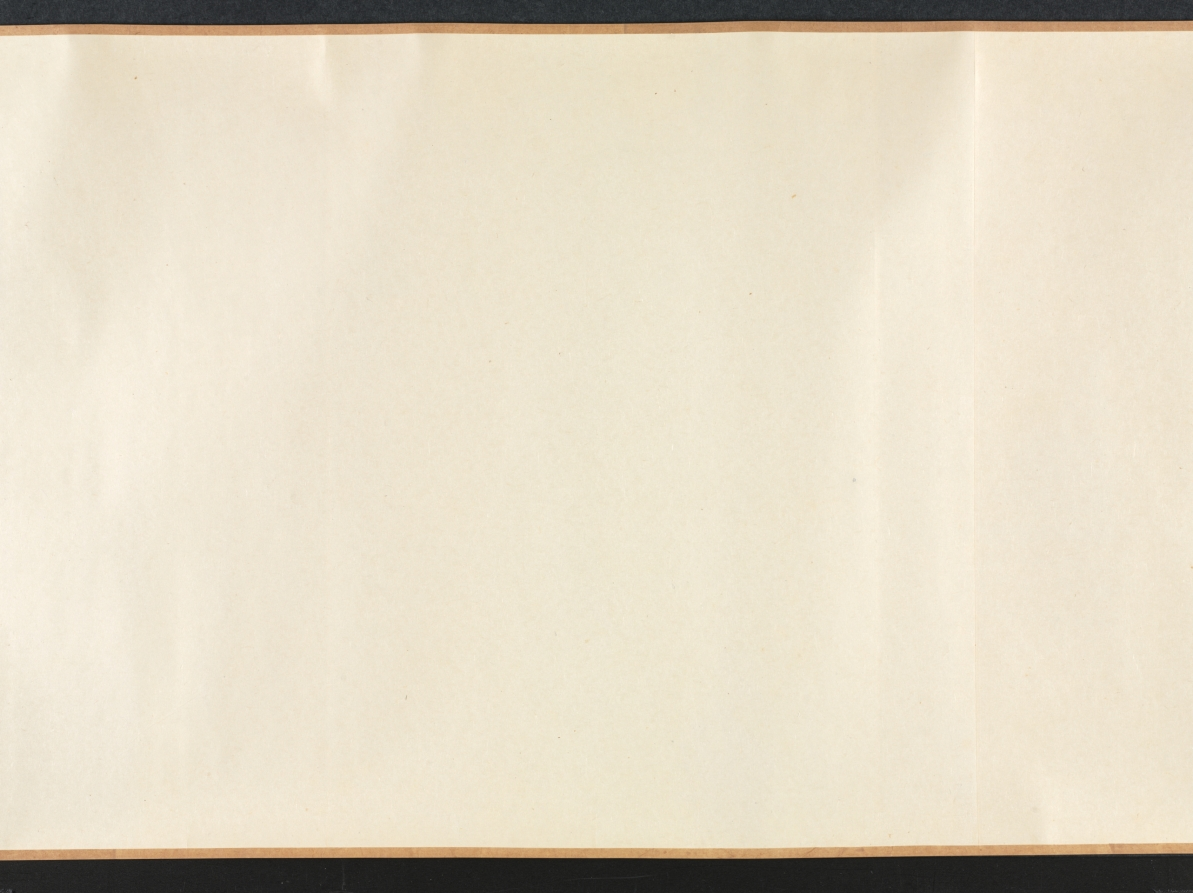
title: Hall of Lofty Pines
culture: China, Qing dynasty (1644-1911)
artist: Wang Hui (Chinese, 1632–1717)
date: 1703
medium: handscroll; ink and color on paper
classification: Painting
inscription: [題] 松喬堂圖 康熙癸未夏六月, 海虞耕煙散人王翬畫。[印]王翬之印; 石谷. [左下] 來青閣; 耕煙野老時年七十有二.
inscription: 松喬堂圖一卷，海虞石谷王君為靜海近公厲少司冦公作也。圖成于癸未之夏。未幾而公遂仙去。公令子今編修君南湖屬余題跋其後。余與公同官侍從，交契最深。側見公之清修純德，蔚為聖天子所眷重。侍直內廷，密勿贊襄，幾二十餘年。蒼生之所以受賜，士林之所以沐德者，天下莫能窺，在廷莫能悉。而公卒不言。以故宸衷日益契，恩禮亦日益渥。雖年逾懸車，時有歸老之念。而上固不聼公之去。其所謂松喬堂者，御書以賜公者也。蓋以松比公之清風勁節，而歲寒不改，經霜彌茂。則又以期公之壽考未有艾焉。公知此身未易乞，而山林槃磵之樂，止可寄諸寤思。此松喬堂圖之所由作也歟。石谷此圖，結構精密，筆墨超邁。其寫樹木之蒼蔚，堂宇之靚幽。恍見摩詰輞川樂天廬山之勝。獨惜公未得一日徜徉故園以償其願。即繪於圖亦未得以永其趣，此編修君之所以眷眷不忘也。雖然千歳之松喬，下蔭百畝，上以修棟梁之需。然則上當日名堂之意，不更望於後之人襲其芘而養其材也哉。吾願編修君之寶斯圖。并望君之塗塈丹雘，大其堂構也已矣。 康熈丙戍重陽三日，雲間王鴻緒跋。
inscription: 10 additional seals: 1 seal of Li Duna 勵杜納 (1628–1703); 4 seals of Zha Ying 查瑩 (jinshi of 1766); 5 seals of Li Yun (dates unknown).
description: Wang Hui 王翬, a leading painter in the orthodox school of the early Qing dynasty (1644–1911), was commissioned to paint this landscape with a country estate for Li Duna 勵杜納 (1628–1703), vice minister of justice in Emperor Kangxi’s court. The emperor had honored Li by granting him a piece of calligraphy with the name of Li’s retirement retreat, “Hall of Lofty Pines.” He drew a comparison between pines and Li’s upright character, resilience, and longevity. Wang Hui’s painting was supposed to allow Li to imagine living in a beautiful, secluded compound among the hills and pines. Sadly, Li died before seeing the completed painting and before receiving the emperor’s permission to retire. The landscape begins with peaceful riverbanks and low hills. The pines around the estate in the middle of the handscroll are truly lofty, some stretching even beyond the frame of the painting. Li Duna, the estate’s owner, is shown twice in his serene mountain retreat: first approaching the entrance to the compound with two servants at the right, and then later in the scroll, to the left, reading in the comfort of an inner room.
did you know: One servant carries the estate owner's carefully wrapped qin, a type of zither.